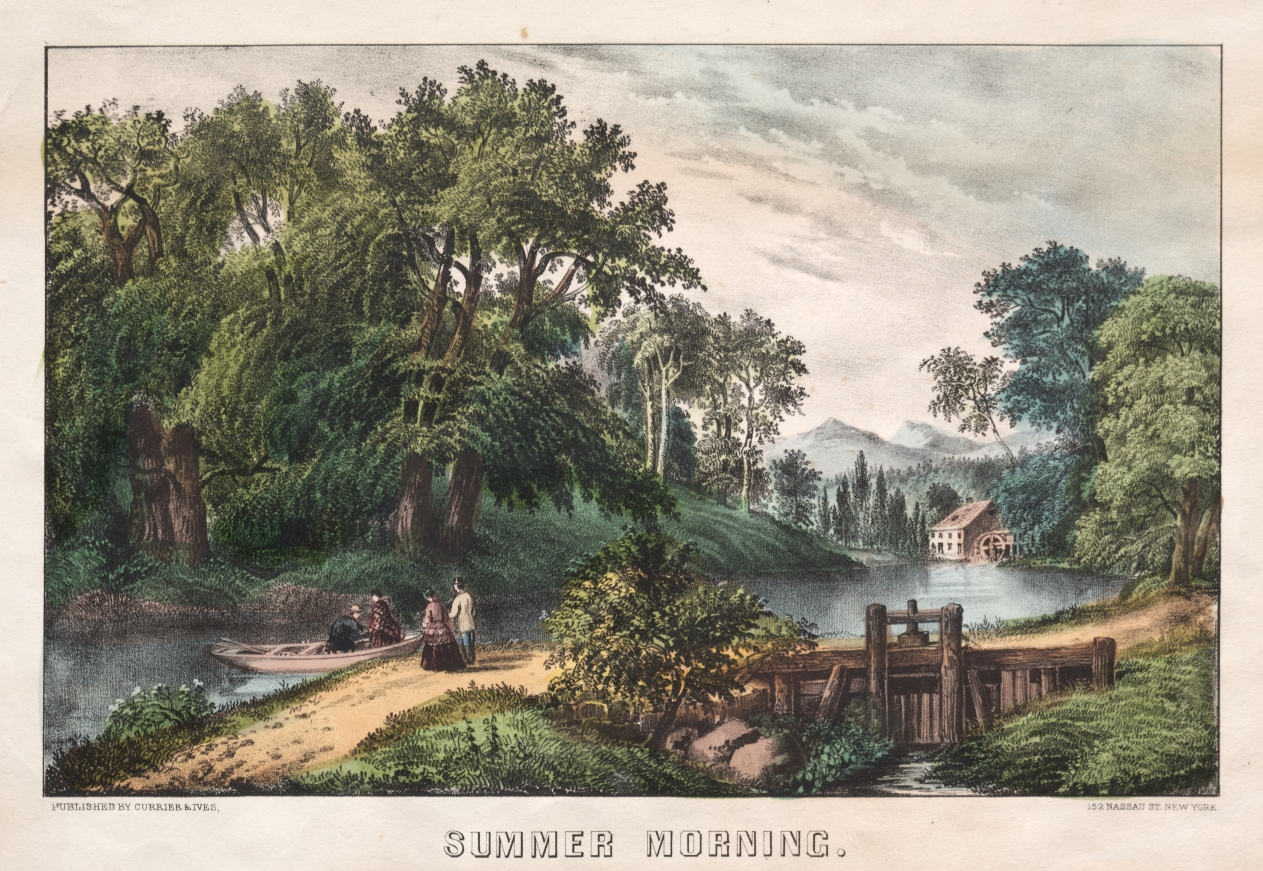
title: Summer Morning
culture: America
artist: and James Merritt Ives (American, 1824–1895)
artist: Nathaniel Currier (American, 1813–1888)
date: c. 1838–72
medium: lithograph, hand colored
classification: Print